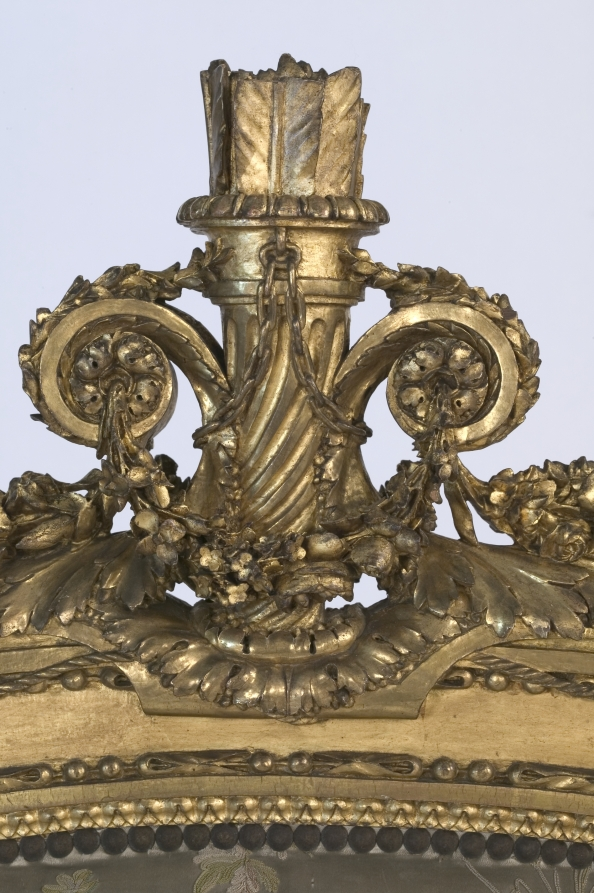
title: Bed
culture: France, 18th century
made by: attributed to Georges Jacob (French, 1739–1814)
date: 1700s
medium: gilded wood and embroidered satin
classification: Furniture and woodwork